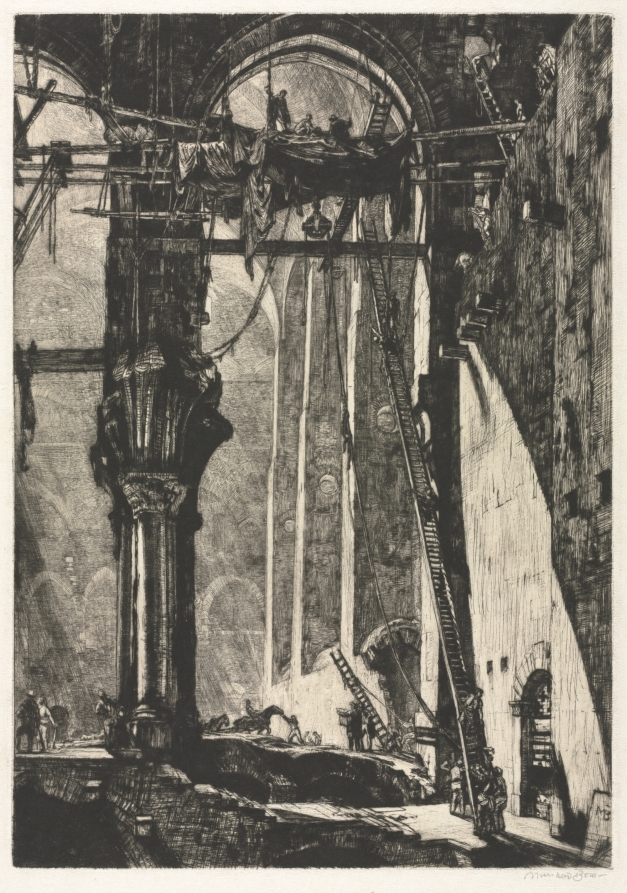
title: Demolition of St. James Hall, Interior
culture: England, 20th century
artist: Muirhead Bone (British, 1876–1953)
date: 1906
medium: drypoint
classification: Print